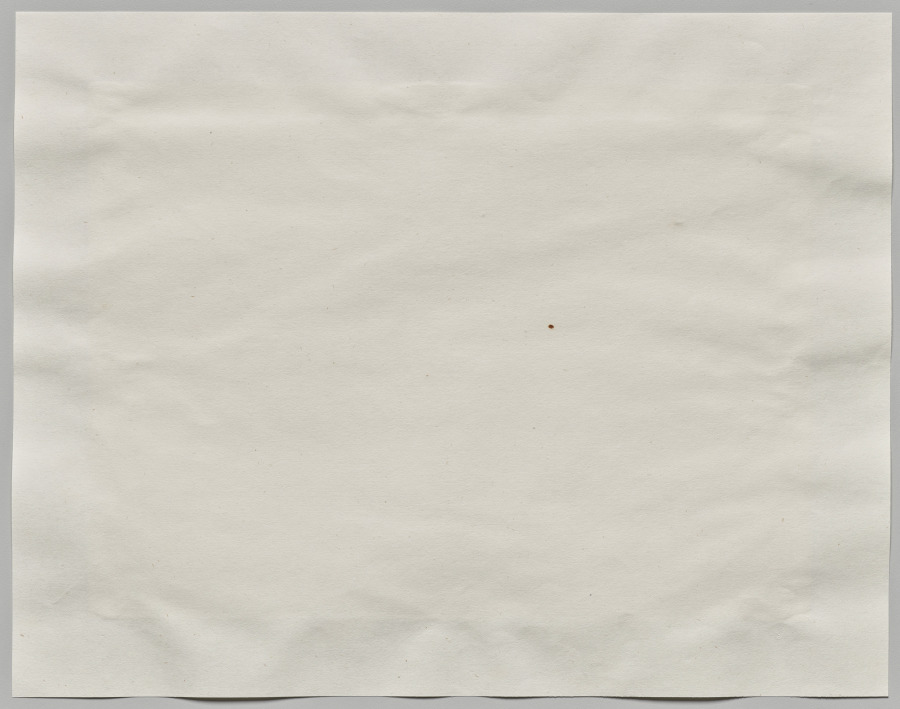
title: Untitled (General view of Hong Kong from the Scandal Point looking west)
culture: England, 19th century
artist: William Pryor Floyd (British, 1834–c. 1900)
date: 1866–73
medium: albumen print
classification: Photograph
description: Hong Kong’s growth, coupled with the heavy traffic of visitors brought by maritime commerce, attracted numerous foreign and Chinese photographers who documented the city’s dramatic and rapid urbanization. The main customers for such views were Westerners—colonists, sailors, merchants, and visitors—rather than Chinese. In this view, the City Hall and St. John’s Cathedral tower over the harbor full of ships in the background.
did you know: Hong Kong, a relatively barren island when ceded to the British in 1842, rapidly evolved from a free port to a British crown colony and mercantile center.